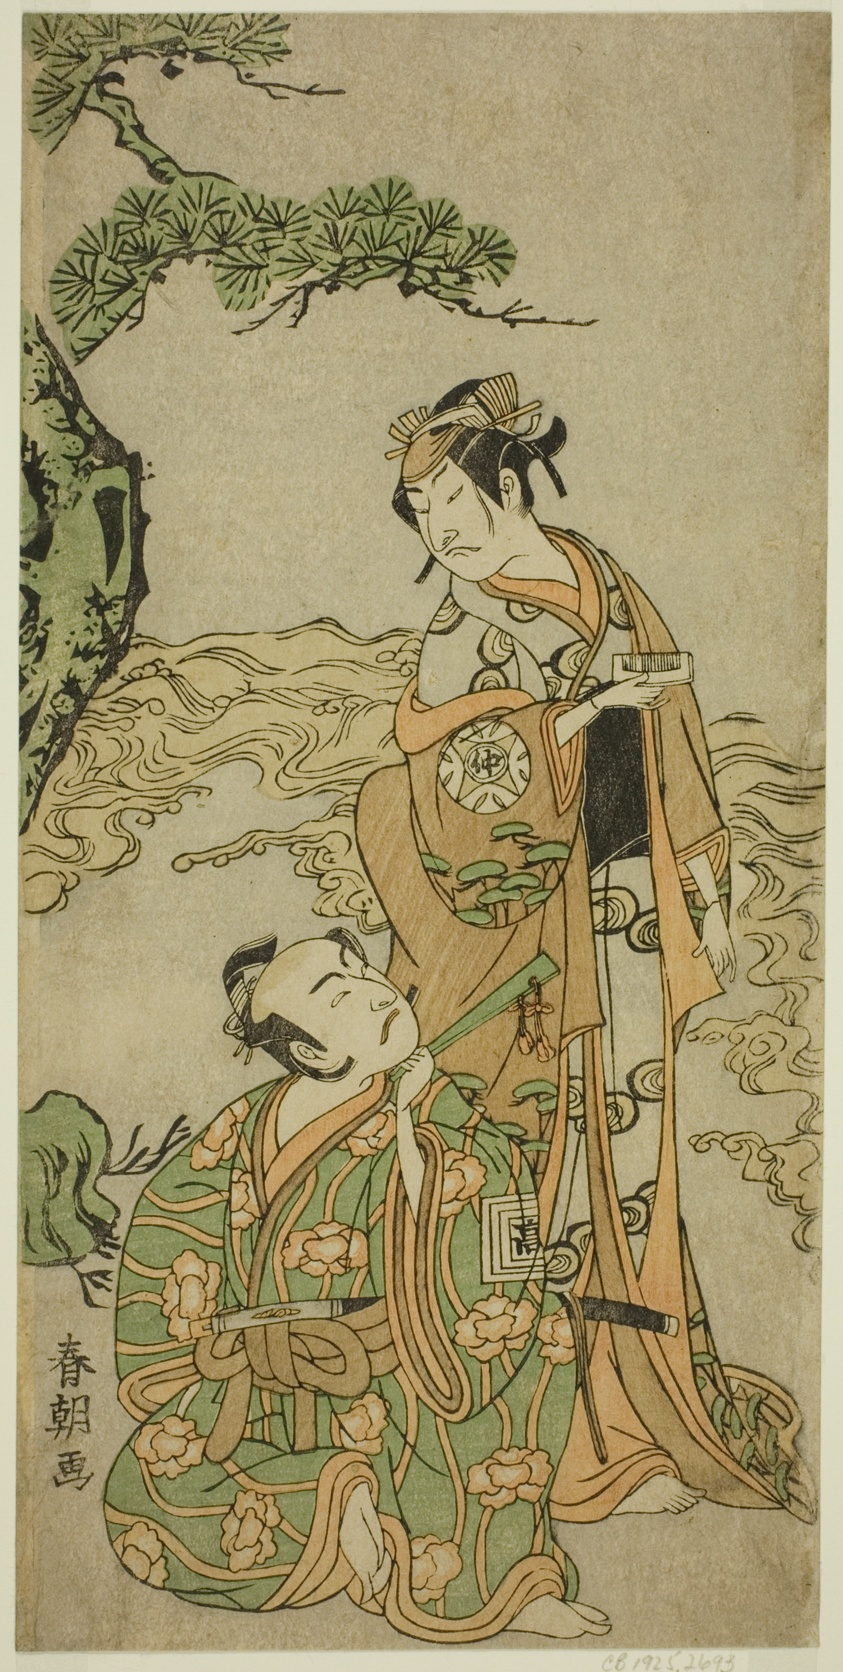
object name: Print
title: The Actors Nakamura Nakazo I as Matsukaze (right), and Ichikawa Komazo I as Yukihira (left), in the Play Kuni no Hana Ono no Itsumoji, Performed at the Nakamura Theater in the Eleventh Month, 1771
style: Japanese (culture or style)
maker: Katsukawa Shuncho; Japanese, active c. 1780-1801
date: c. 1771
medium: Color woodblock print; hosoban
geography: Japan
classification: woodblock print; print; asian art